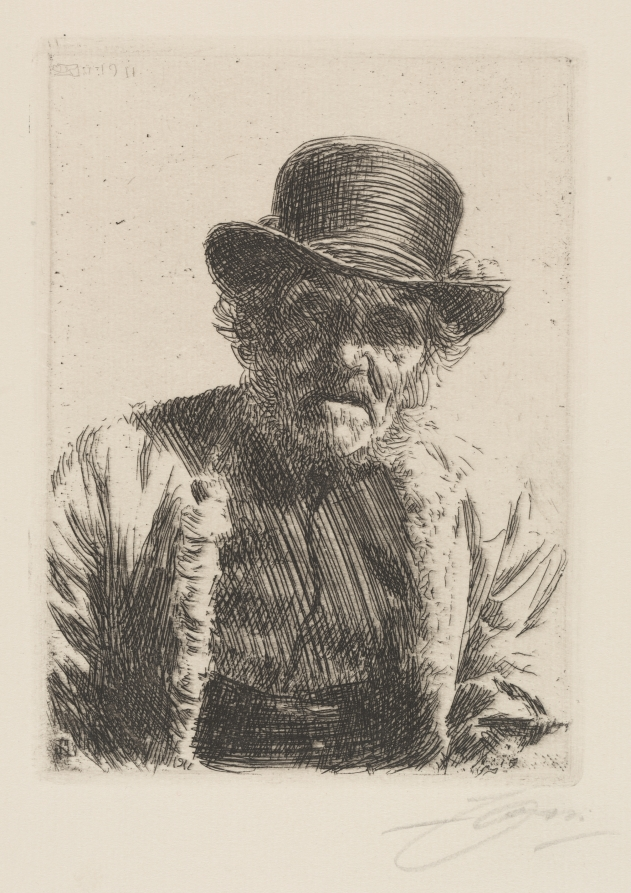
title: Beadle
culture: Sweden, 20th century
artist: Anders Zorn (Swedish, 1860–1920)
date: 1911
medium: etching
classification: Print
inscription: Lower right margin, in pencil: A Zorn